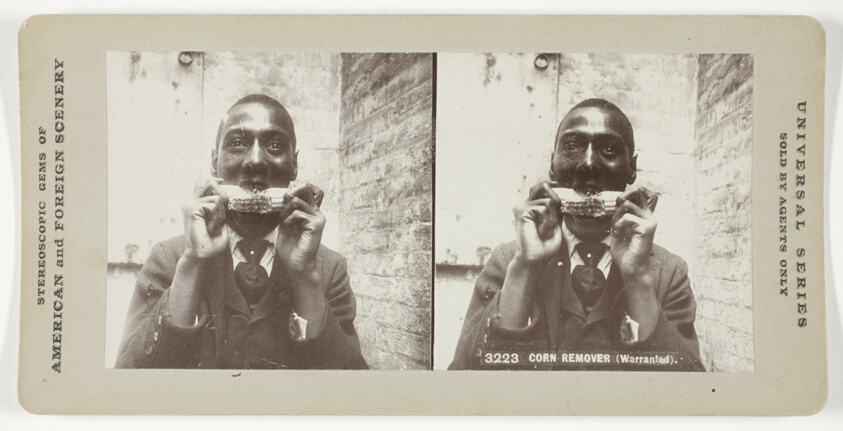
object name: Photograph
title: Corn Remover (Warrented), No. 3223 from the series "American and Foreign Scenery"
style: 19th century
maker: Artist unknown; American, late 19th century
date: 1875/99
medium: Albumen print, stereo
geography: United States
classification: photography; photograph